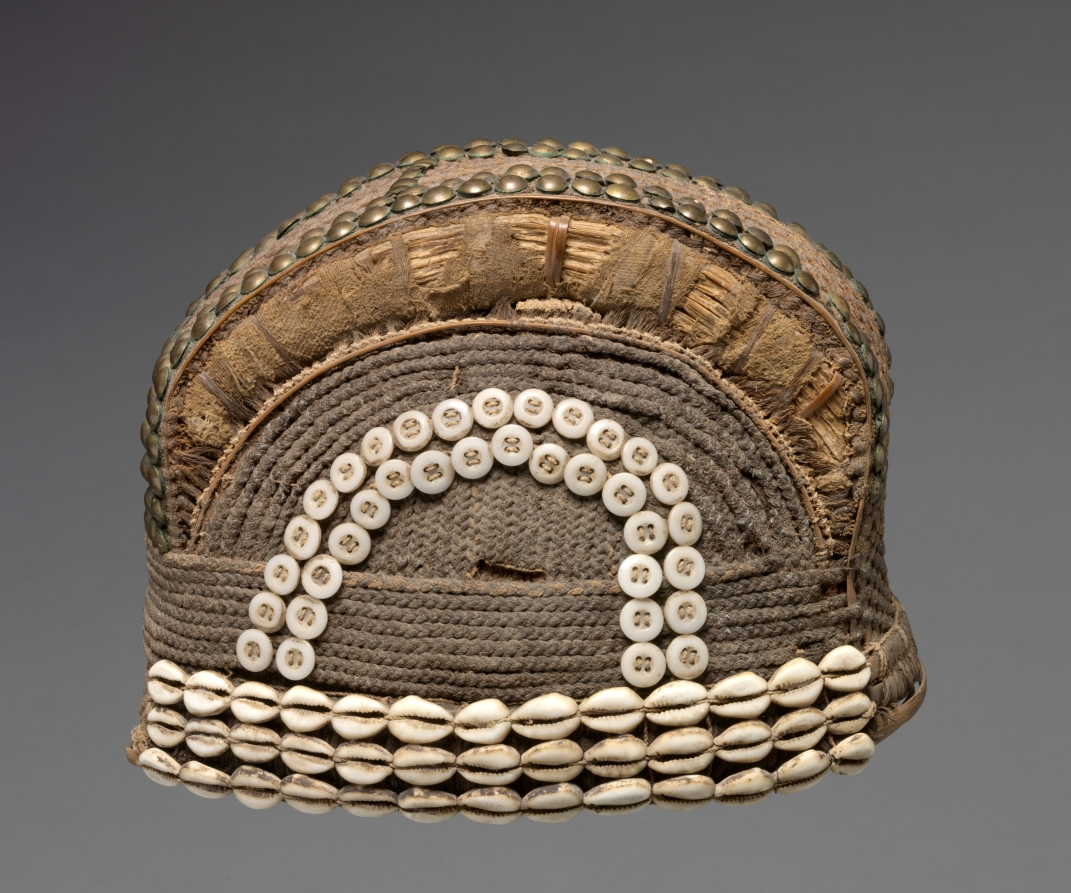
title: Headpiece (nlo-o-ngo)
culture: Africa, Central Africa, Gabon, Fang style, unknown maker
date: early 1900s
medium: Plant fibers, cloth, hair, cowrie shells, buttons, upholstery studs, and thread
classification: Garment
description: This headpiece (nlo-o-ngo) was made to look like a similarly shaped hairstyle. While the coiffure gained height from inserts tucked under the hair, here the underlying basket was woven into a central ridge. Plant fibers were woven or braided to mimic hairstyling techniques. Rarely removed, the hat gave the appearance of elaborately styled and decorated hair. Three rows of cowries around the band evoke a shell or bead headband, while the metal furniture tacks are the same as would have been inserted into the hair. Existing in many styles, men or women wore these wiglike headdresses to signify status, group identity, or social roles.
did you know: Sculptors depicted these characteristic headpieces and coiffures in figurative works that guarded the remains of ancestors.